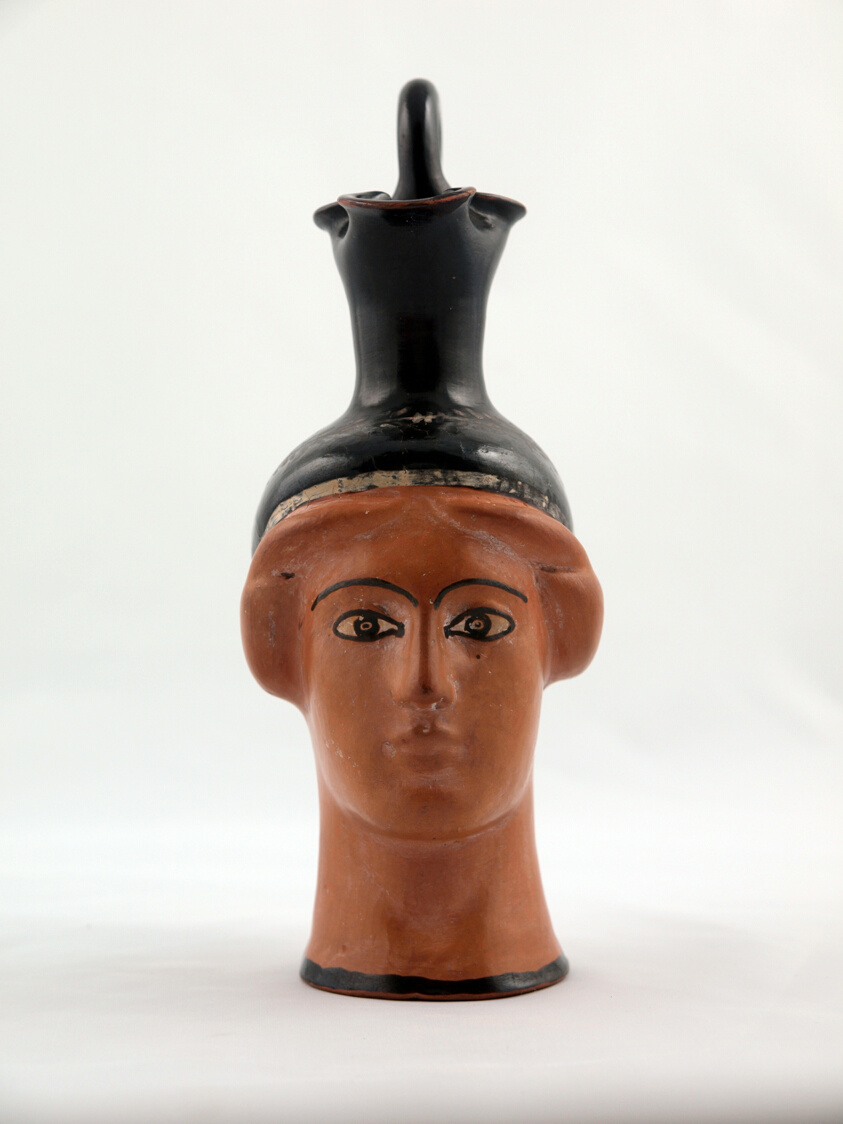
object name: Vessel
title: Oinochoe (Pitcher) in the Shape of a Female Head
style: attic, red-figure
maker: Attributed to the Canessa Class; Greek; Athens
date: about 450 BCE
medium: terracotta, red-figure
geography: Athens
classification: pitcher (vessel); vessel; ancient art